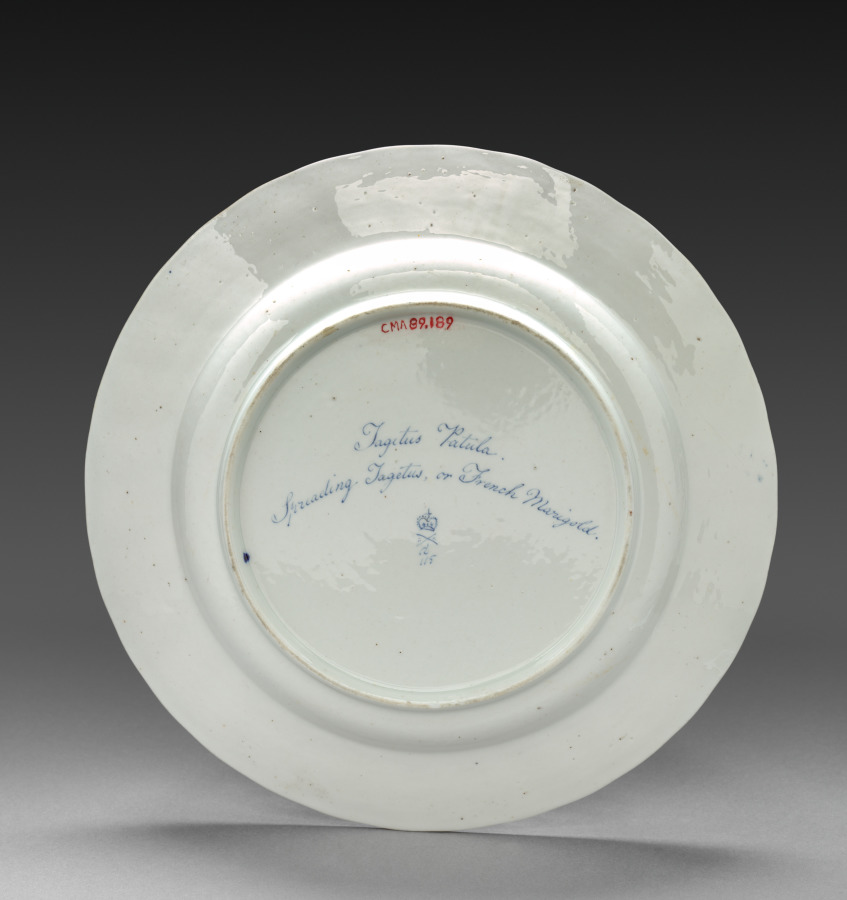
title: Plate from Dessert Service: French Marigold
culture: England, Derby, 18th century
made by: Derby (Crown Derby Period) (British)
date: c. 1800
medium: porcelain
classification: Ceramic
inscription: inscribed in blue on back: Fagitus Patula./Spreading Fagetus, or Fench Marigold./crown/crossed batons and dots/D/115.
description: Each dish is decorated with recognizable plants, the names of which are inscribed on the base in both Latin and English. Identifying the blossoms only became customary in the late 18th century when a single piece of porcelain was decorated with one species, and flowers were represented along with leaves, stems, seed pods, and roots. All of this reflects Carolus Linnaeus’s recent invention of a scientific method to categorize all known flora. The decorations on the Derby factory’s products derive from contemporary English botanical publications. For instance, illustrations in William Curtis’s The Botanical Magazine served as models for the French marigold and nettle-leaved bell flower on the dessert service.